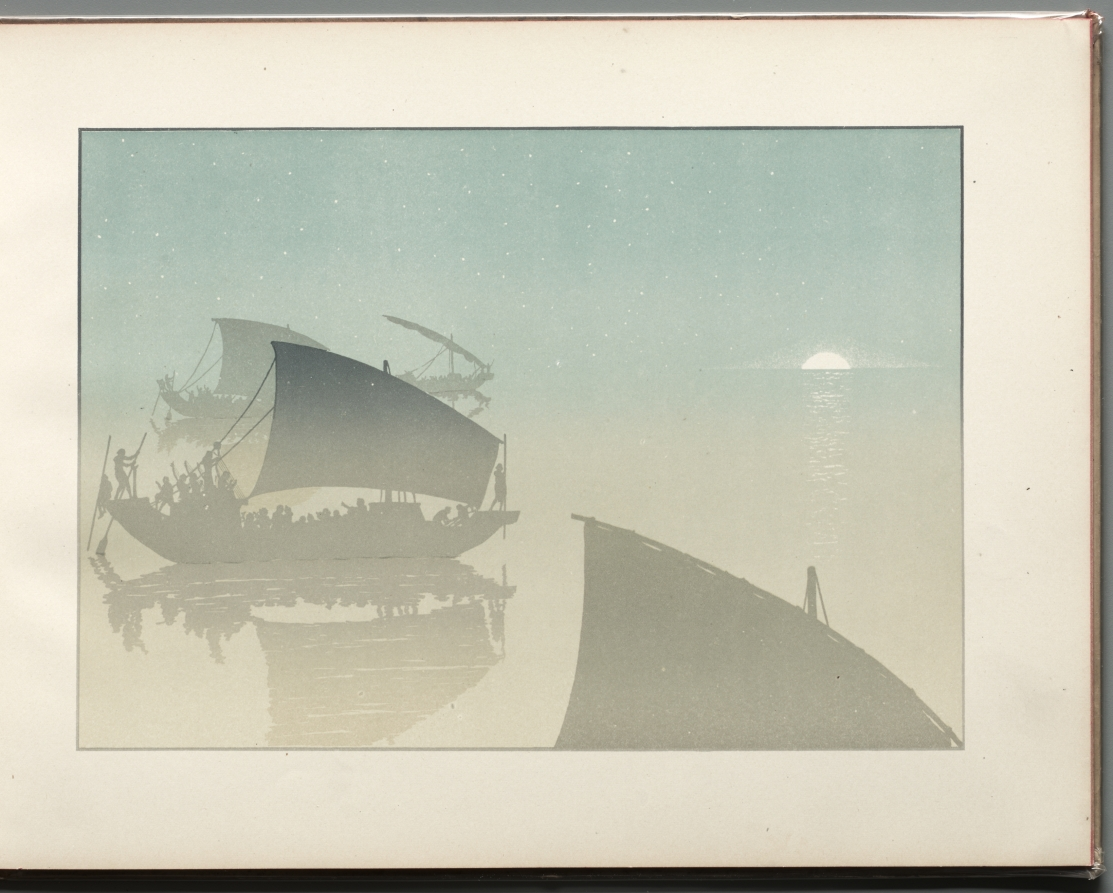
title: The Prodigal Son: Quatrième Tableau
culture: France, 19th century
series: Bound Volume illustrating the poetry and music of Georges Fragerolle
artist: Henri Rivière (French, 1864–1951)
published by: E. Flammarion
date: 1895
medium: 15 color lithographs in a bound volume illustrating the poetry and music of Georges Fragerolle: color lithograph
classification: Bound Volume